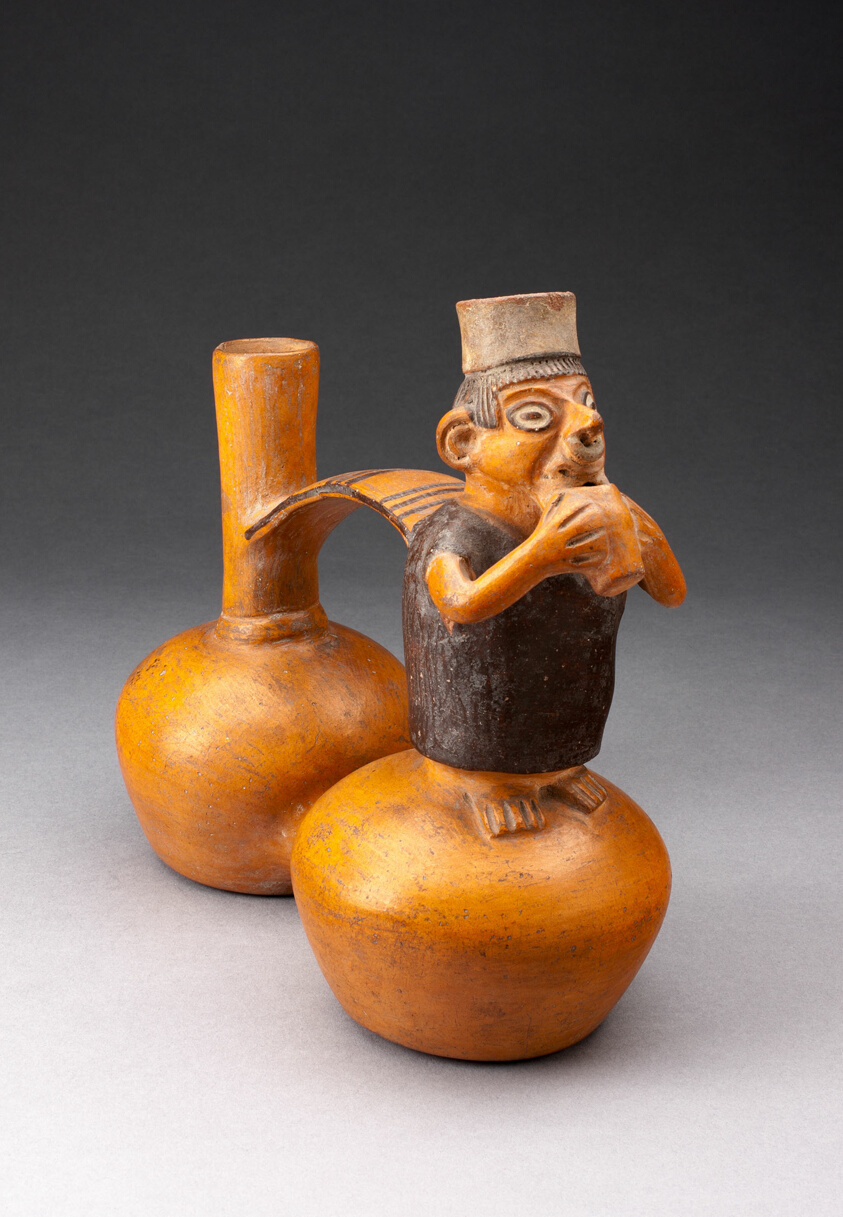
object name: Vessel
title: Double-Chambered Jar Depicting a Figure Holding a Cup or Flute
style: nieveria, Arts of the Americas, andes, south american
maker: Nievería; Central coast, Peru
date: 500–800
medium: Ceramic and pigment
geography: Nievería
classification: earthenware; art of the americas; ceramics; vessel